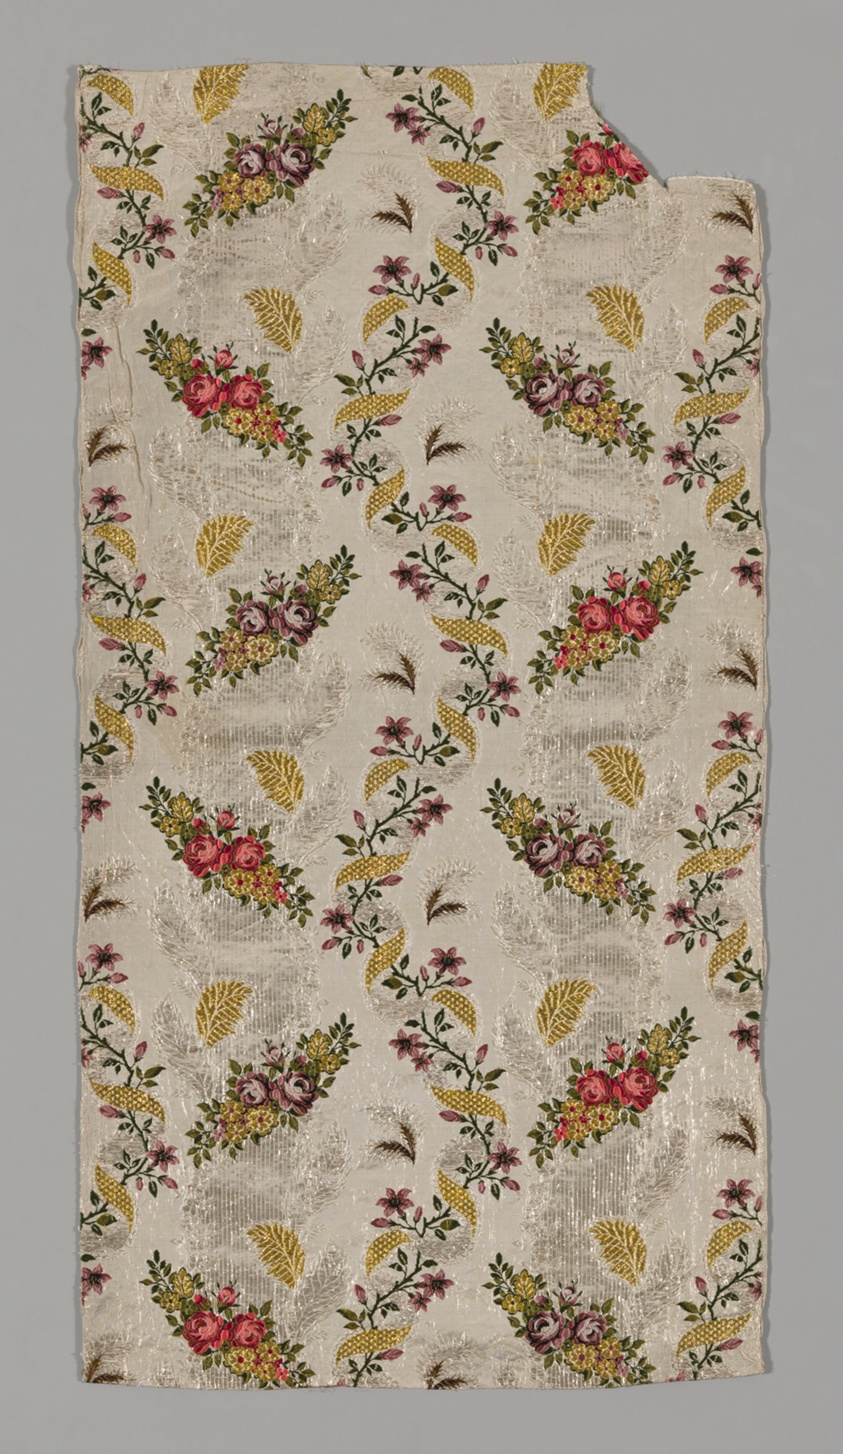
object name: Textile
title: Panel from a Skirt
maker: England, Spitalfields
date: c. 1753/55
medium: Silk, gilt-and-silvered-metal strip, and gilt-metal-strip-wrapped silk, plain weave with patterning and brocading wefts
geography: Spitalfields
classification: textile; weaving